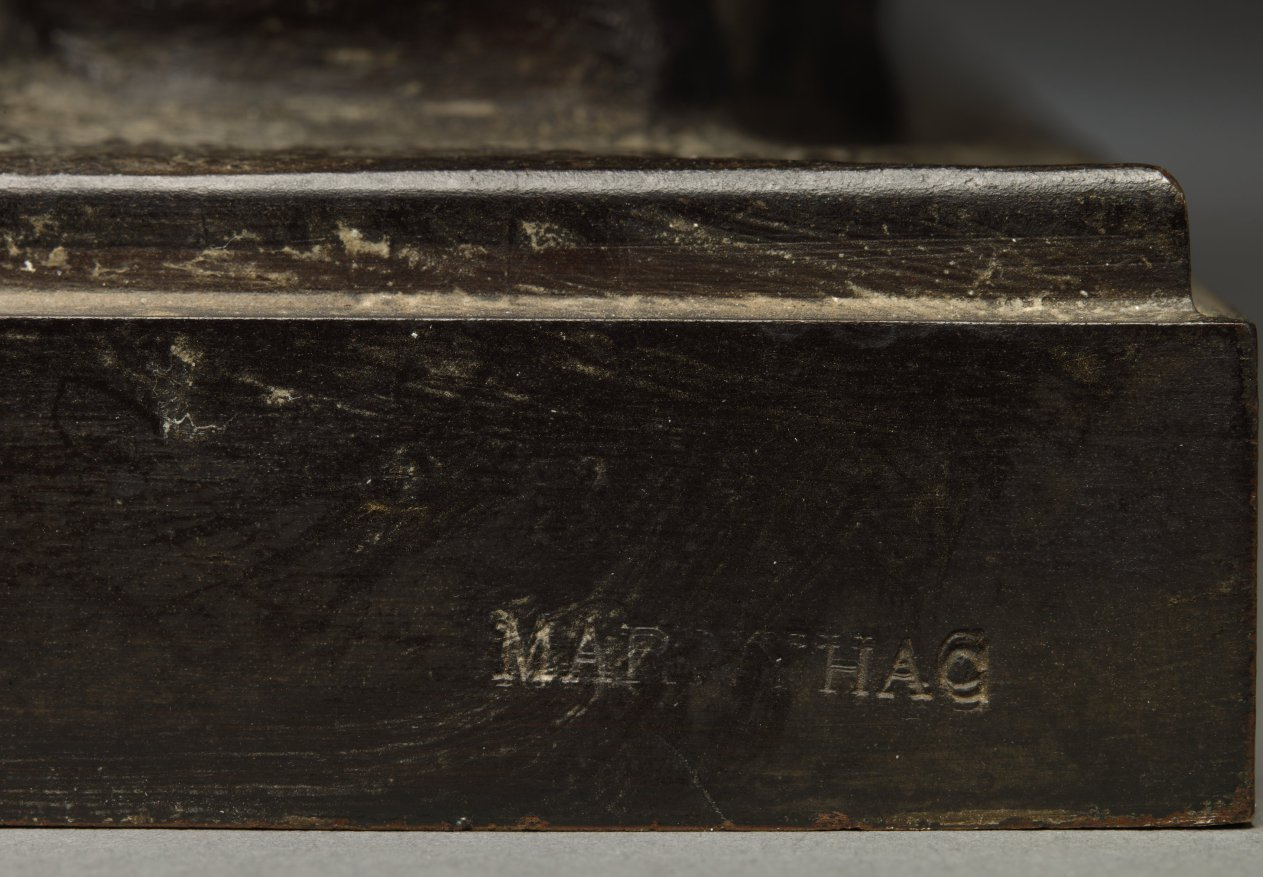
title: Ariadne on a Panther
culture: France, 19th century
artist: Jean-Baptiste Clésinger (French, 1814–1883)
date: 1873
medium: bronze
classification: Sculpture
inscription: signed on side of base: "J. CLESINGER"; inscribed around edge of stamp: "BRONZE ARTISTIQUE/DE PARIS"; on cut of neck of woman, "CAYUZ"; on edge of base: "1 Rue de la PAIX."